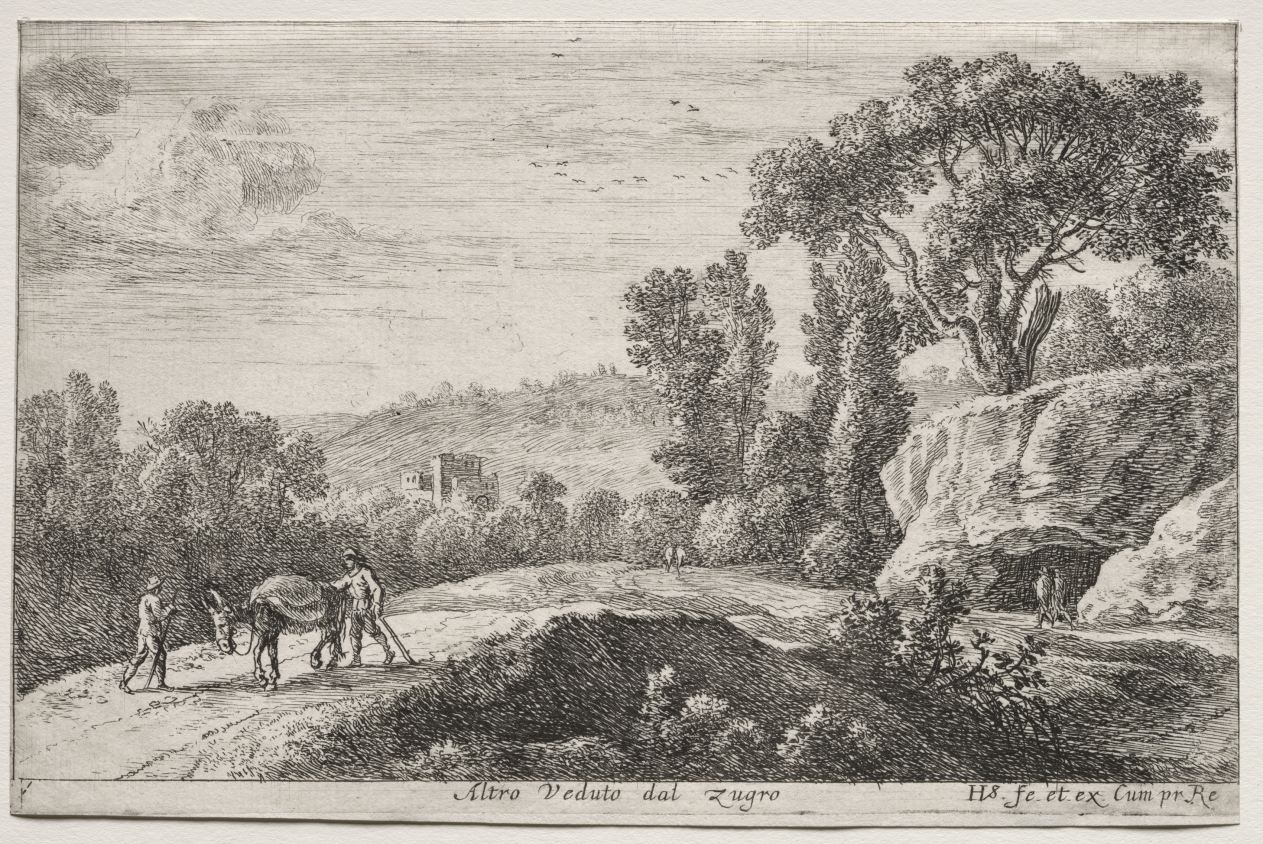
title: Diverse Views in and around Rome: Second View of Zugro (Altro Veduto dal Zugro)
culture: Netherlands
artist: Herman van Swanevelt (Dutch, c. 1600–1655)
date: c. 1652–53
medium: etching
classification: Print